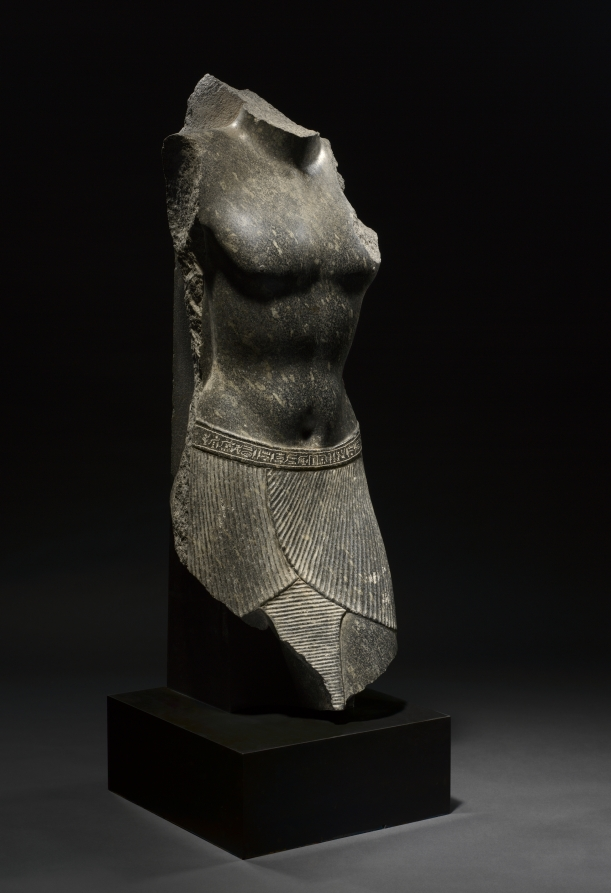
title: Torso of Amenpayom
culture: Egypt, Greco-Roman period (332 BCE–395 CE), Ptolemaic dynasty (305–30 BCE)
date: probably 200–100 BCE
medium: granodiorite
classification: Sculpture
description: This magnificent life-sized torso is inscribed for Amenpayom, the great army general of the district of Mendes in the Nile Delta. By the end of the Ptolemaic dynasty (305-30 BC) when this statue was made, the Egyptians could draw on 3,000 years of expertise carving hard stone. Enough remains to show that Amenpayom was represented in the traditional pose for men: left leg striding forward, arms at his sides, and supported by a back pillar. The subtle, masterful treatment of the undulating musculature and meticulous, flawless polish are hallmarks of this period, when Egyptian artists reveled in the natural beauty of the human form.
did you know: On the back Amenpayom is depicted again worshiping the gods of Mendes, Harpocrates, Banebjedet, and Hatmehit.